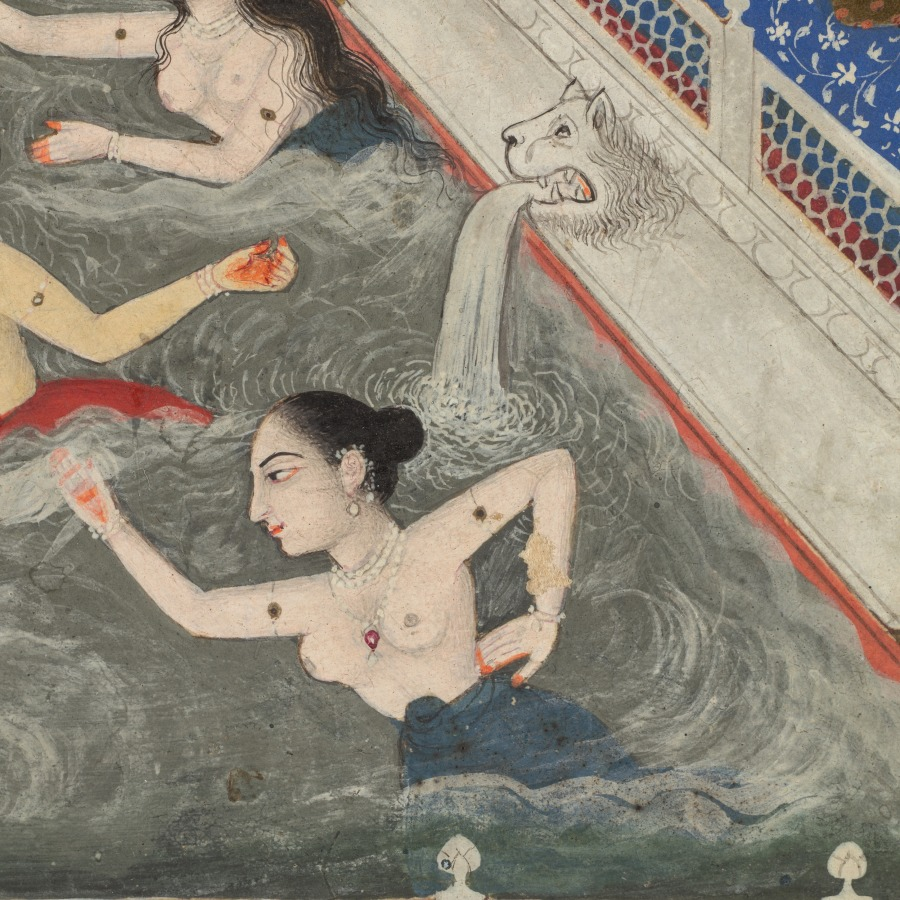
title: Women bathing before an architectural panorama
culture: India, Lucknow, Mughal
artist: Fayzullah (Indian, active c. 1730–1765)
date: c. 1765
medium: Gum tempera and gold on paper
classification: Painting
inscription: Persian inscription in center, on marble balustrade, in nasta‘liq script: The work of Fayzullah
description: Despite the wars waged and forts besieged in the background, life in the palace is carefree and luxurious. Some women enjoy hookahs and music on balconies, while others swim and drink liquor with abandon from Chinese porcelain cups and bottles. The artist has placed his name under the central pavilion, observing the scene across a formal garden of marigolds. The artist seems to have enjoyed experimenting with the idea of perspective, learned from European sources. He created a rapidly receding space that telescopes the view from the intimate harem quarters to the distant battlefields.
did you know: The artist signed his name below the king’s seat that overlooks the garden vista.